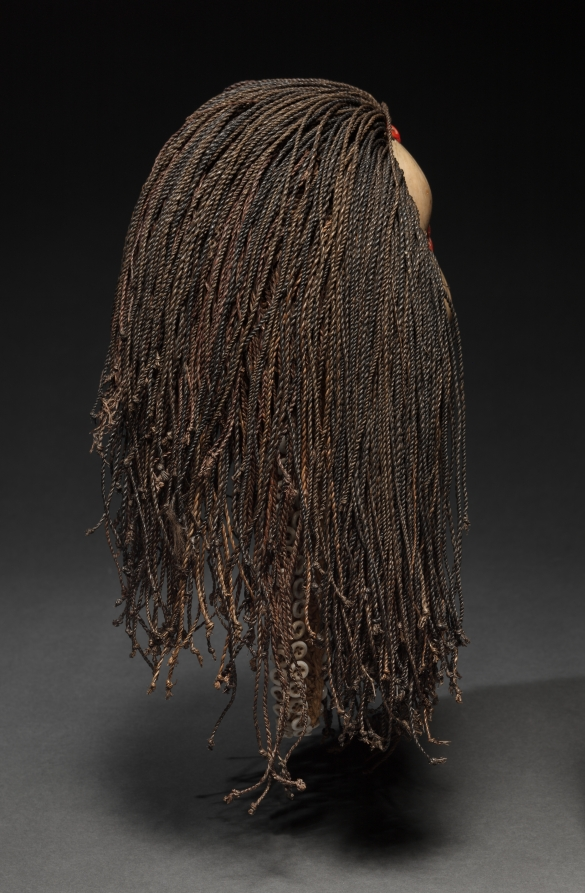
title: Man's Bwami Prestige Cap (sawamazembe)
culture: Africa, Central Africa, Democratic Republic of Congo, Lega-style maker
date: early to mid-1900s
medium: Plant fiber, seashells, seeds, pods, buttons, and probably cotton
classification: Garment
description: Among the Lega people of the eastern Democratric Republic of Congo, headgear was an important indicator of social position. Certain caps, headbands, and headdresses were the exclusive prerogative of the Bwami men's association. This headdress, called sawamazembe, was worn only by high-ranking members of this group. The hat's wig-like form represents a woman's coiffure, illustrating the blurring of gender distinctions among high-ranking Bwami members. The shell ornaments on the front suggest the moon, while buttons and a seed pod provide additional embellishment.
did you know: This prestige cap combines local organic materials and imported machine-made materials like buttons.